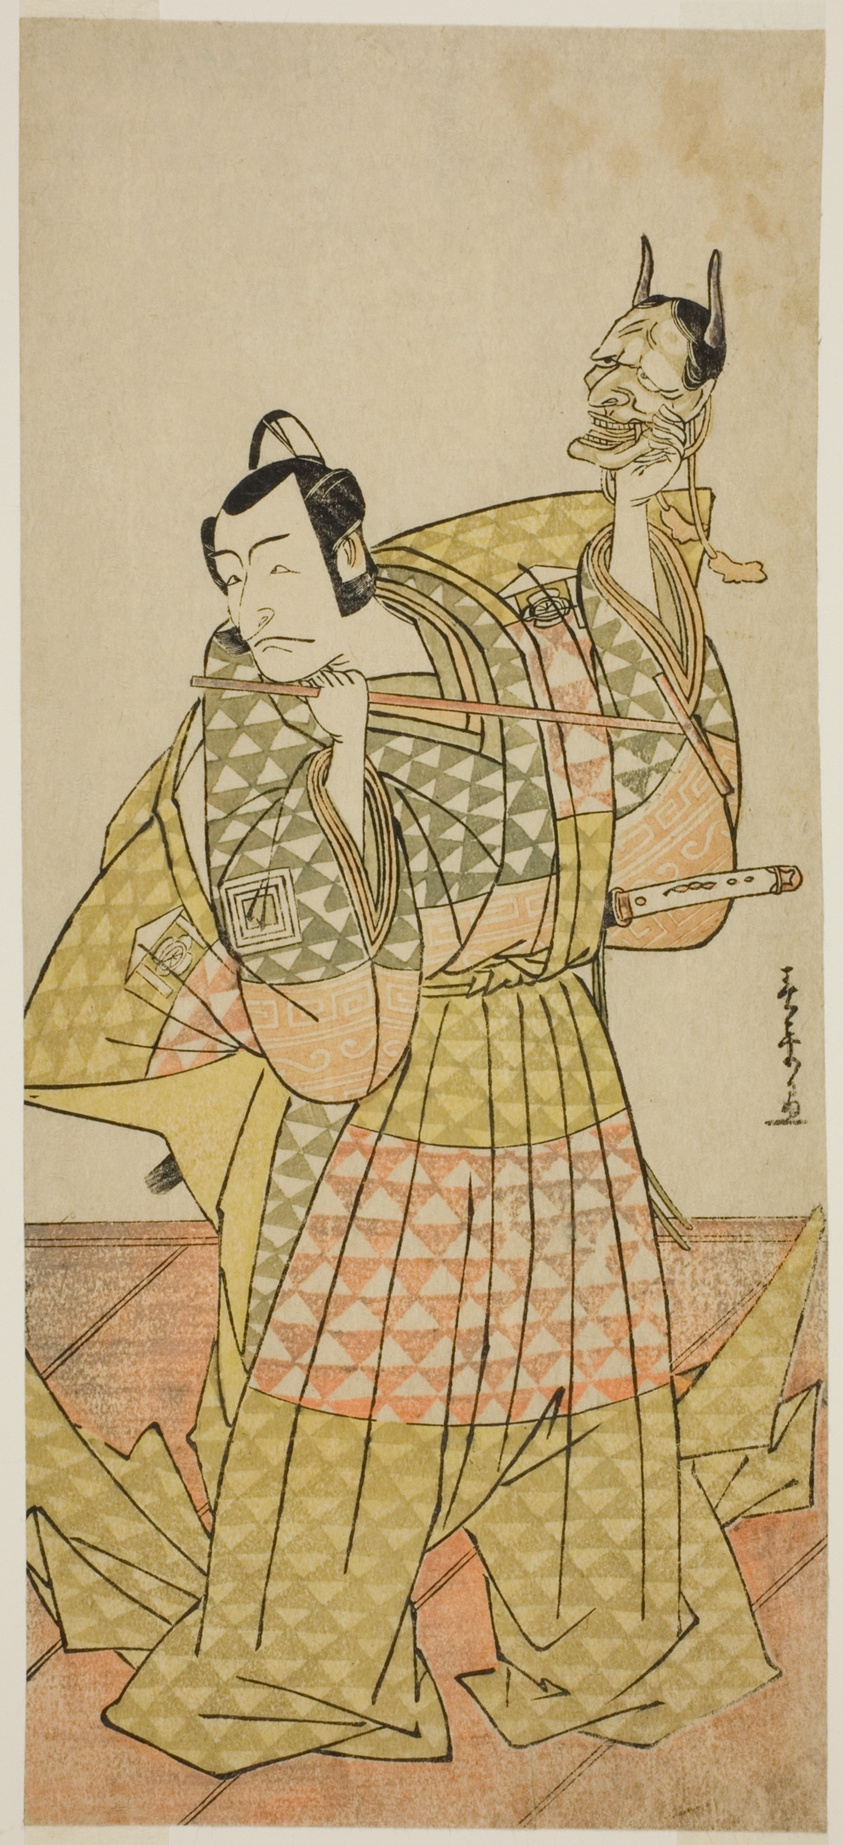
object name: Print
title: The Actor Ichikawa Danjuro V as Kudo Suketsune in the Play Kaido Ichi Yawaragi Soga, Performed at the Nakamura Theater in the First Month, 1778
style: Japanese (culture or style)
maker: Katsukawa Shunsho 勝川 春章; Japanese, 1726-1792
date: c. 1778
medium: Color woodblock print; hosoban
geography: Japan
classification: woodblock print; print; asian art